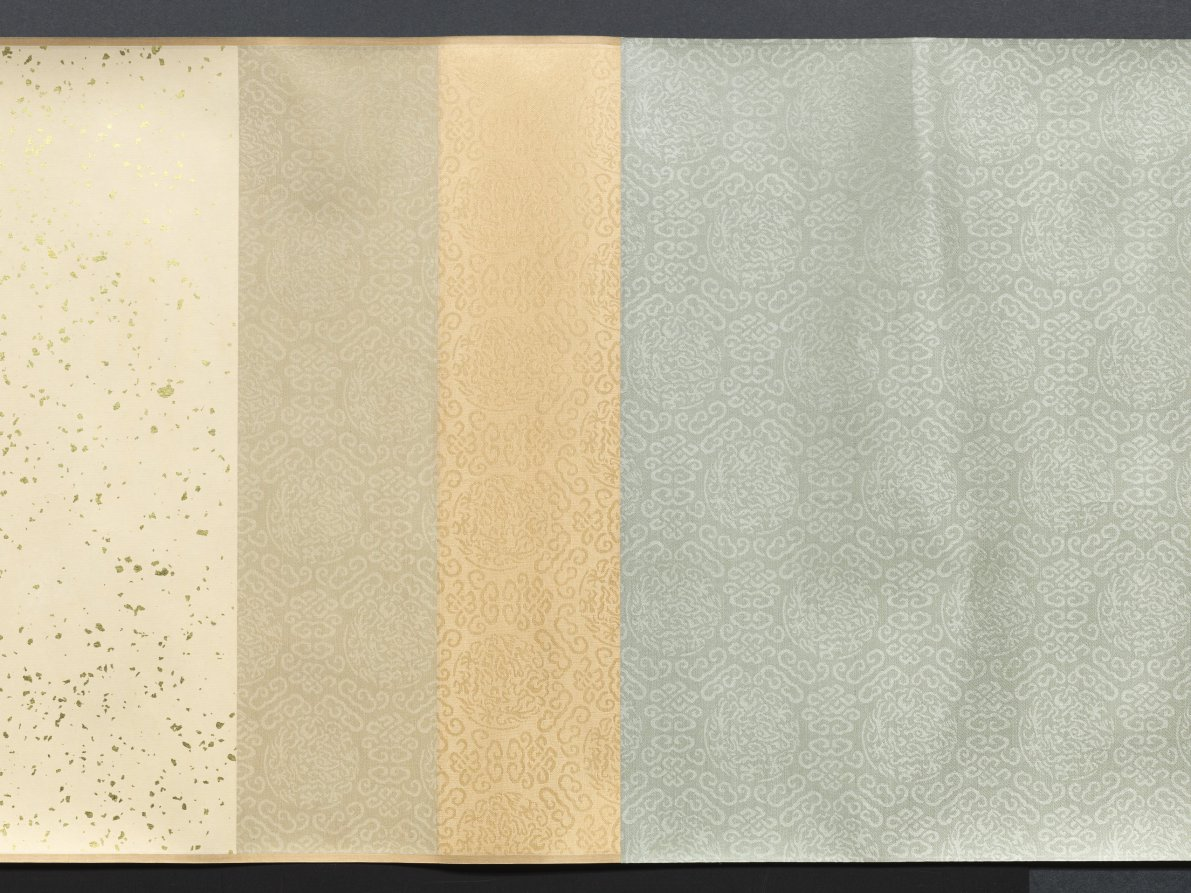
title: Calligraphy in Running Style based on Wang Bo's Essay on Tengwang Pavilion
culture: China, Changbai, Qing dynasty (1644-1911)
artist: Tiebao (Chinese, 1752–1824)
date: 1811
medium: handscroll, ink on paper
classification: Calligraphy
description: A member of the Donggo clan, Tiebao belonged to the Manchu Plain Yellow Banner army. As an official in the Qing court, he endured considerable vicissitude and his career was never smooth. Celebrated as a man of letters, he oversaw the publications of the Manchu military system as well as an anthology of poems by members of the imperial family and other Manchu dignitaries. In calligraphy, he was regarded as the equal of such eighteenth-century luminaries as Liu Yong (1720-1805) and Weng Fanggang (1733-1818). This handscroll is a work of his mature years and is exemplary of his disciplined and highly subtle approach to the art of calligraphy.